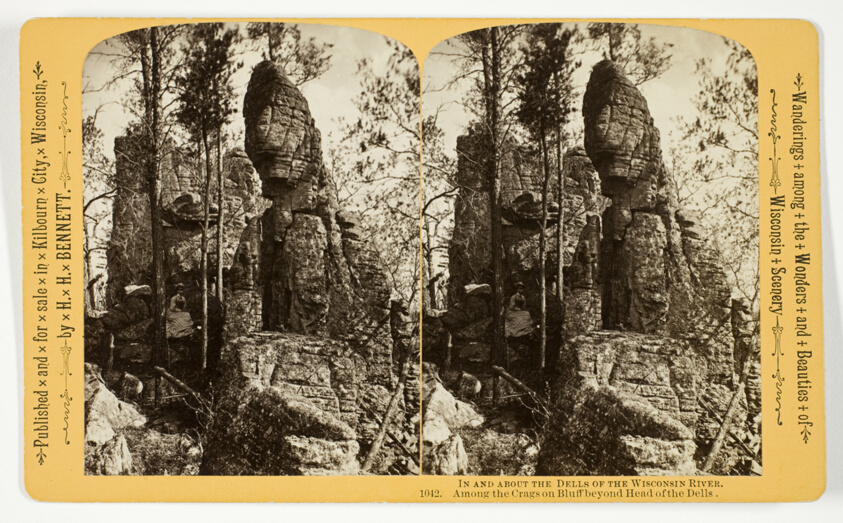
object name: Photograph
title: Among the Crags on Bluff beyond Head of the Dells, No. 1042 from the series "In and About the Dells of the Wisconsin River"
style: 19th century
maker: Henry Hamilton Bennett (American, born Canada, 1843–1908)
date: 1870/1908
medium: Albumen print, stereo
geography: United States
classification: stereograph (albumen); albumen silver print; photographic process; photography; photograph